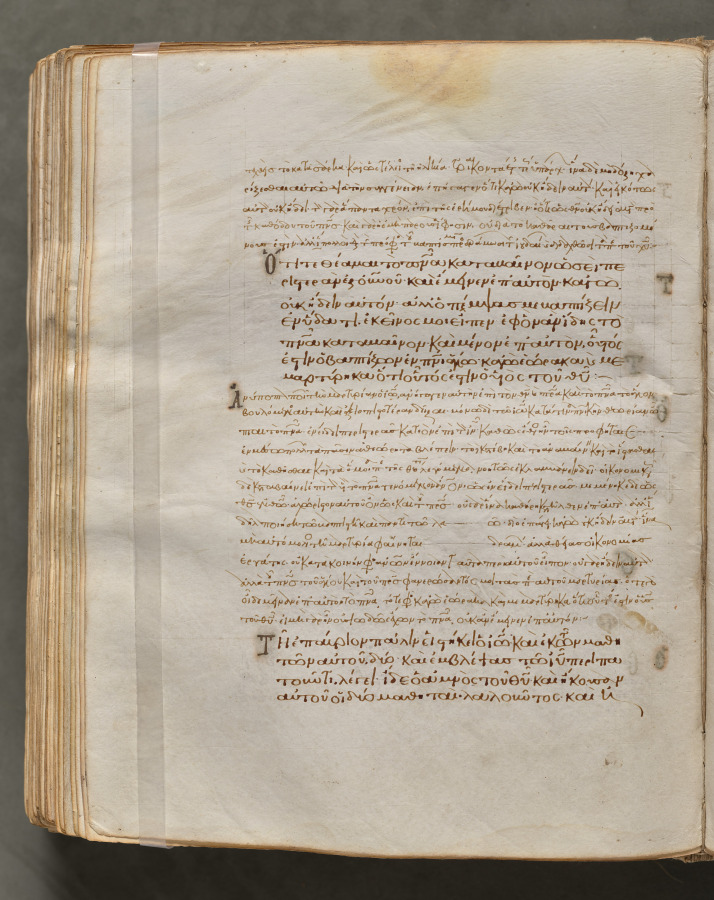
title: Text, folio 327 (verso), from a Gospel Book with Commentaries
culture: Byzantium, Constantinople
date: c. 1000–1100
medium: ink, tempera, and gold on vellum; leather binding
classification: Bound Volume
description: Each of the four gospels in this book opens on a page with brilliantly illuminated borders depicting the author of the text as well as birds—principally peacocks, symbols of the immortality of the soul—and fountains, representing the fountain of life and the salvation of the soul. This volume consists of 428 leaves with texts in Greek. Its level of sophistication suggests that it was probably written and decorated in a monastery in Constantinople.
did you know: Gospel books were carried in procession through Byzantine churches.